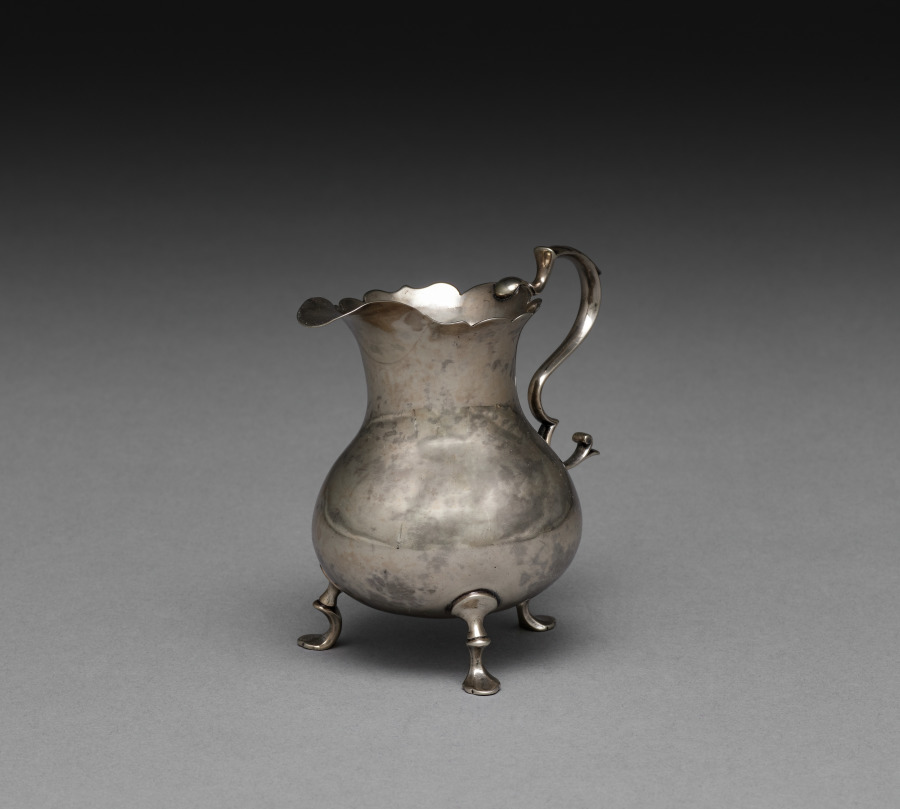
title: Cream Jug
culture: America, Rhode Island, 18th century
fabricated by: Samuel Casey (American, c. 1724–c. 1780)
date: c. 1750–1770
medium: silver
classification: Silver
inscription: engraved "P" over "R*L" in shaded block letters on bottom, just above mark. (The owner's initials, which appear to be original to the cream jug, have not been identified.)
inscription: Stamped underside: "S:CASEY".